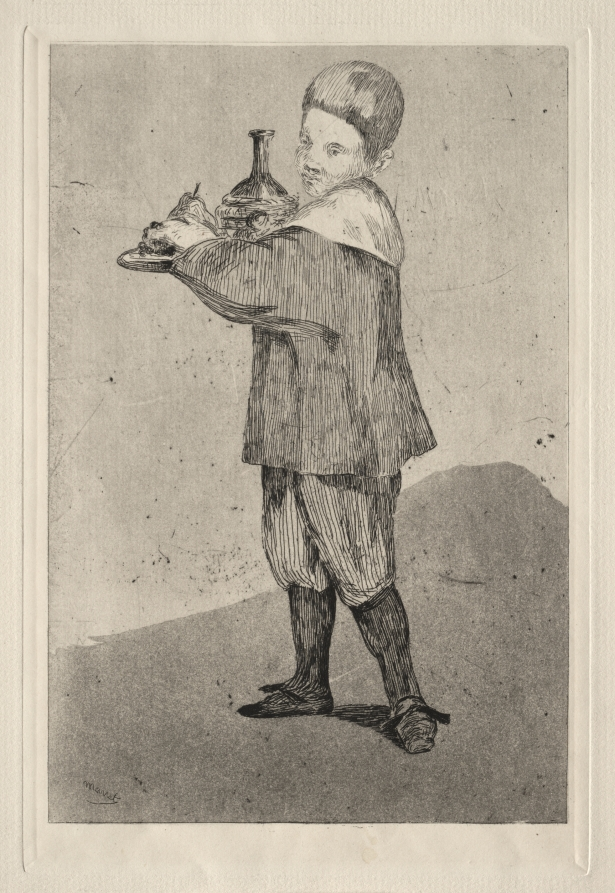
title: The Boy Carrying a Tray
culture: France, 19th century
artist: Édouard Manet (French, 1832–1883)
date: 1860–62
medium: etching and aquatint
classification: Print